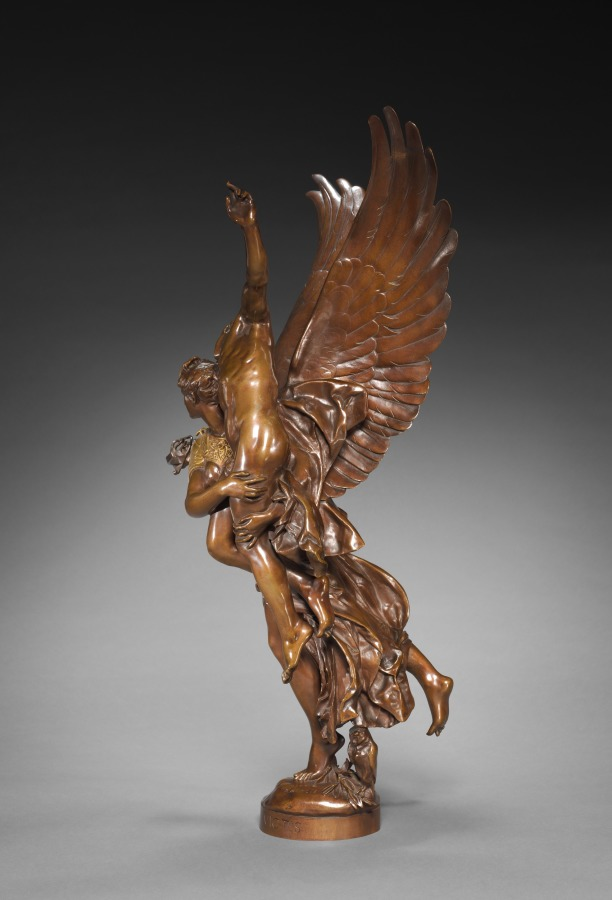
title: Gloria Victis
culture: France, 19th century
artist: Antonin Mercié (French, 1845–1916)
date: c. 1880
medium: bronze with gilding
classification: Sculpture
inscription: Signed near foot at right: "A. MERCIE."; inscribed rear: "F. BARBEDIENNE. FONDEUR."; inscribed front of base: "GLORIA VICTIS."